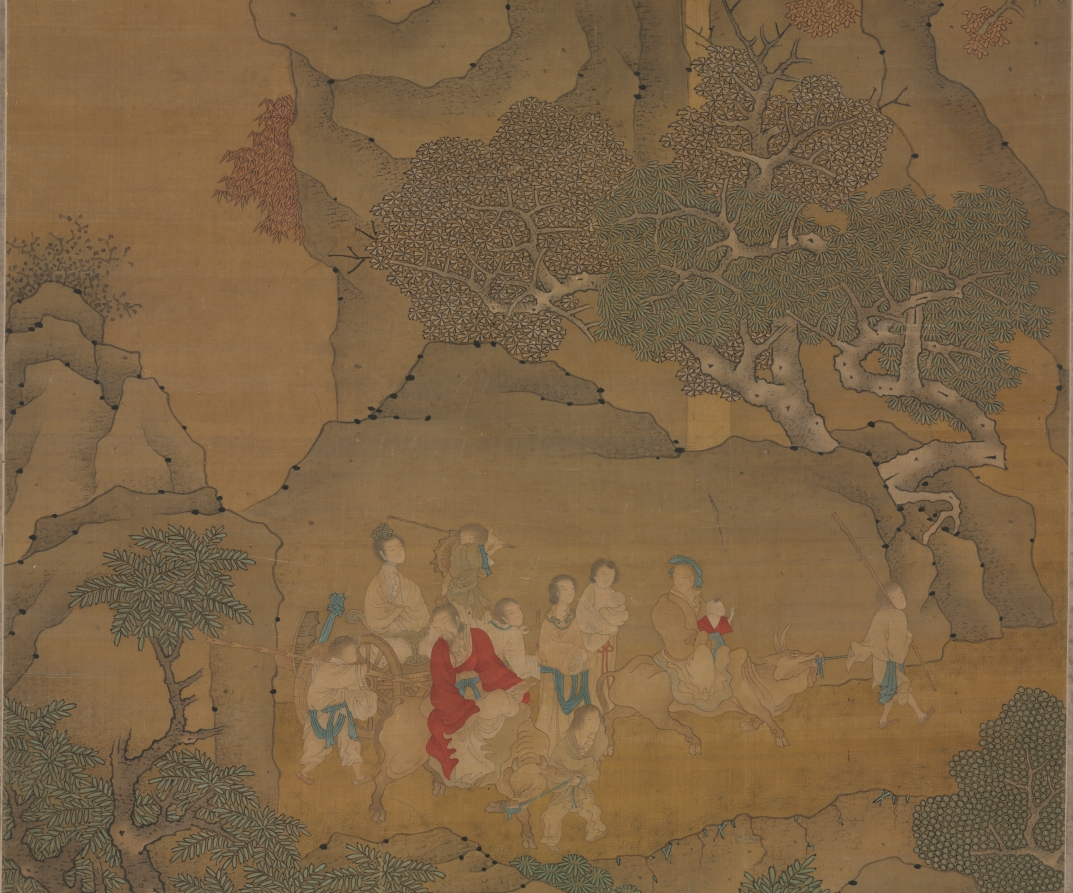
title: Xu Jingyang Moving His Family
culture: China, Ming dynasty (1368–1644)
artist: Cui Zizhong (Chinese, 1574–1644)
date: 1644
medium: Hanging scroll; ink and color on silk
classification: Painting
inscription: Artist's 2 seals: Pei-hai, Cui Zizhong yin.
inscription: 9 additional seals: 2 of Xiang Yuan (18th-19th c.); 1 of Tang Zuomei (late 18th-19th c.); 1 of Zhang Heng 張珩 (1915-1963); 1 of C. C. Wang 王季遷 (1907–2003); 4 unidentified.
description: Xu Jingyang was a dedicated fourth-century Confucian official who allegedly turned into a Daoist immortal. This scroll depicts the legend that when he attained immortality, he took his entire household, including chickens and dogs, to paradise. Cui Zizhong’s painting style intentionally referenced ancient masters. Typical of the pre-Song dynasty landscape tradition, there is the use of blue and green colors and an emphasis on outline rather than texture. While the trembling outlines are reminiscent of earlier painters, the flickering light on rocks and trees is a stylistic feature of Cui’s own time.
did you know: Xu Jingyang, wearing red, is in the upper register of figures, while below his servants transport a rooster, dog, and other supplies.